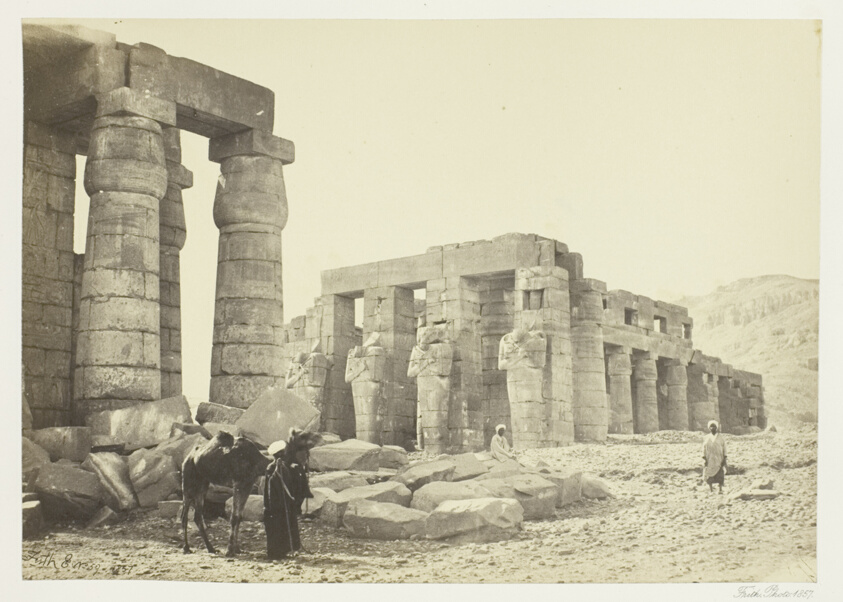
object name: Photograph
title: The Memnonium, Thebes, from the Plain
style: 19th century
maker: Francis Frith (English, 1822–1898)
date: 1857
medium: Albumen print, pl. 35 from the album "Egypt and Palestine, Volume I" (1858)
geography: England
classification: photograph; albumen silver print; photography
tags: Collected by Hugh Edwards, Egypt and Palestine